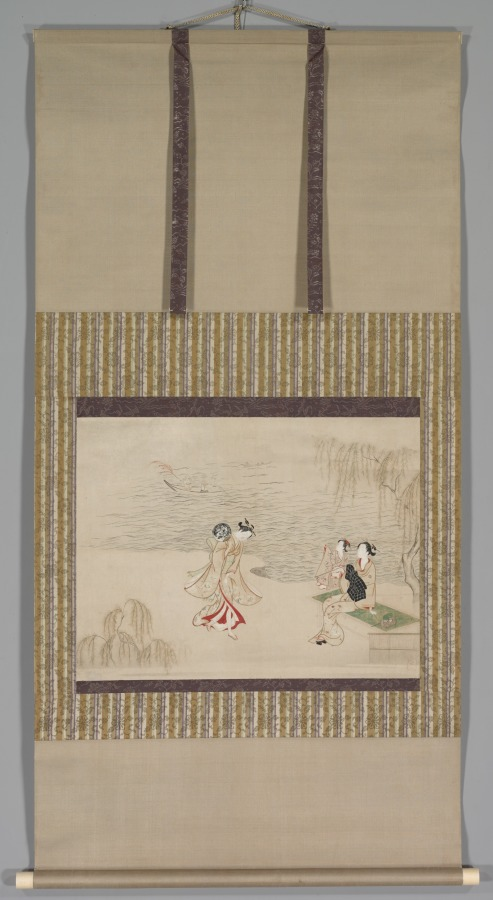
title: Beauties at the Seashore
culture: Japan, Edo period (1615–1868)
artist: Ippitsusai Bunchō (Japanese, active c. 1765–92)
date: c. 1765–92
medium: hanging scroll; ink and color on paper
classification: Painting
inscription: Undeciphered, severely faded seal in lower right corner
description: Bunchō portrays the popular subject of cooling off by the water on a late spring or early summer evening, as suggested by the willow. The seated lady enjoys her pipe-smoking—a popular pastime for Edo women. In the background, some fireworks are set off from a small boat.